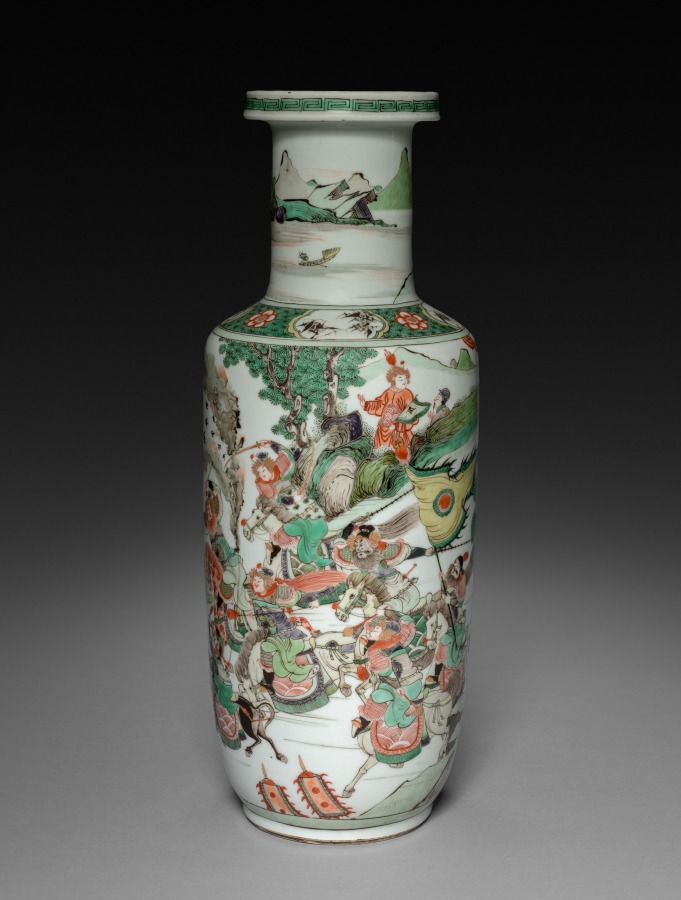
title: Vase with Decoration of Horsemen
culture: China, Qing dynasty (1644-1911), Kangxi reign (1662-1722)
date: 1622–1722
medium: porcelain with famille verte overglaze enamel decoration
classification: Ceramic